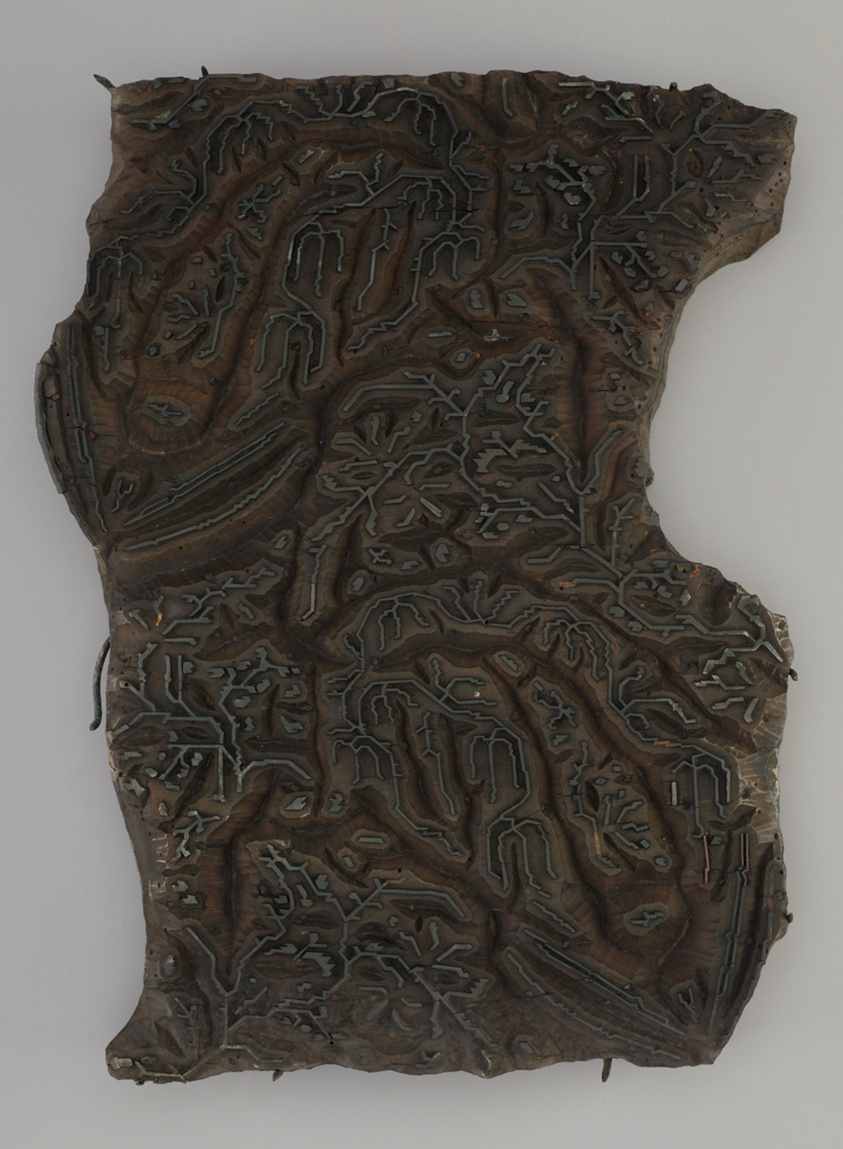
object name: Textile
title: Six Printing Blocks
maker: England or France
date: before 1850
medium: Carved wood, treated in a variety of techniques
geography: England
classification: printing blocks (printing surfaces); textile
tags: paisley